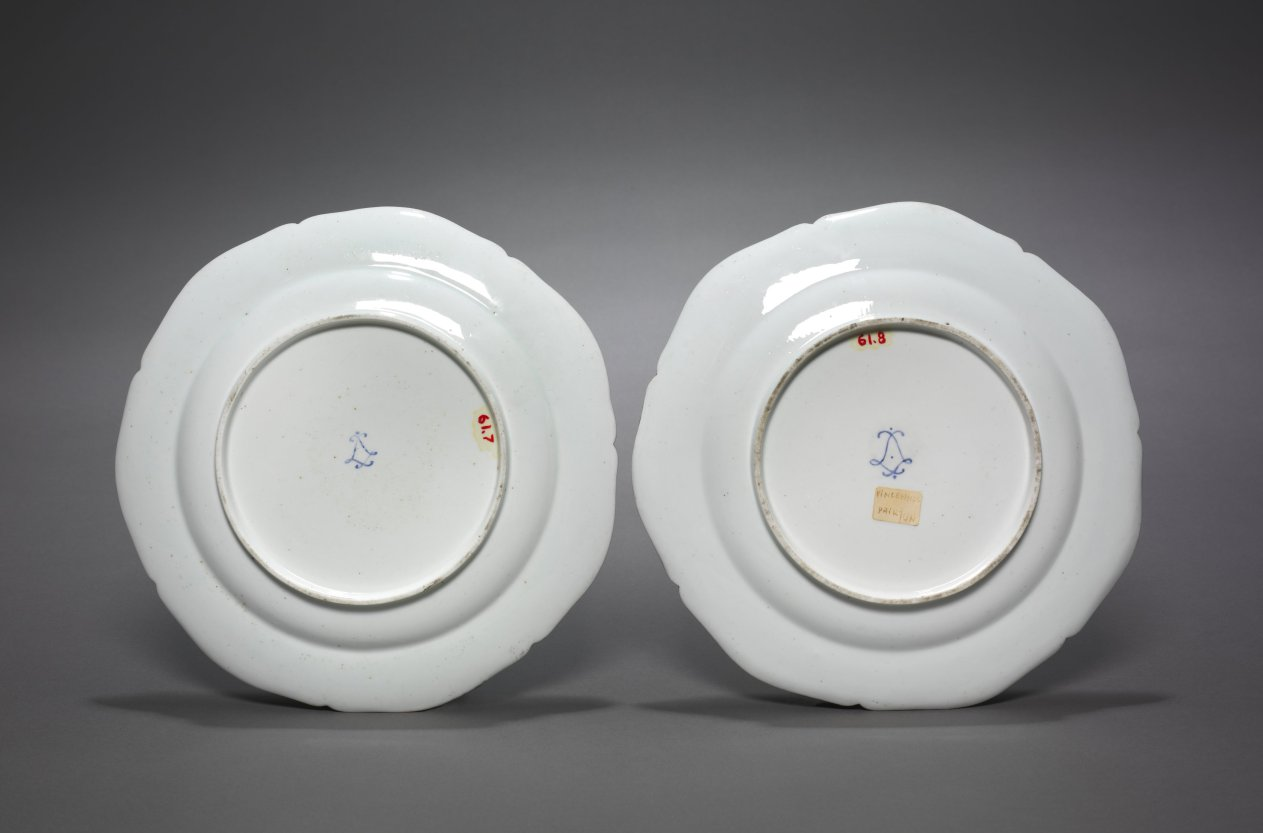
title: Pair of Plates (Assiettes)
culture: France, Vincennes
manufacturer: Vincennes Porcelain Factory (France, 1740–56)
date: c. 1748–51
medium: Soft-paste porcelain with enamel and gilt decoration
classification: Ceramic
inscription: [Interlaced 'L's with three dots: above, below and in the middle (1971.7.2)]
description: Known as “German flowers,” naturalistic floral compositions painted on Meissen factory porcelain in the 1740s influenced the paintings of French and English porcelain factories. At the Vincennes factory in the 1750s, botanically accurate flower paintings were regularly represented. The flowers seen here take inspiration from Meissen, while at the same time representing an early attempt at a distinctly French style of porcelain painting that emphasized bright, clear colors.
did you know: Though the Vincennes porcelain factory had a royal privilege for gilding as early as 1745, it was not until 1748 that they were able to put this process into practice when they bought the secret to its production from Benedictine monk, Hippolyte Lefleure.